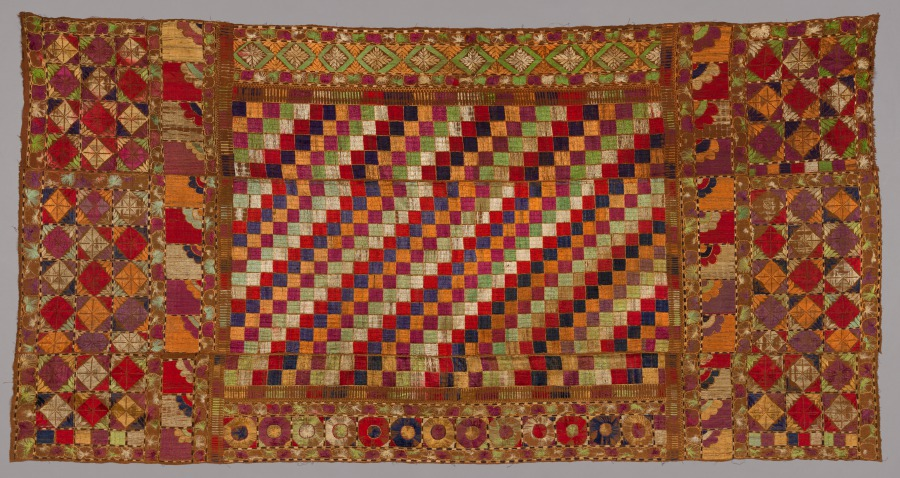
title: Shawl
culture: India, Punjab, 19th century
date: 1800s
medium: embroidery (phulkari); silk on cotton ground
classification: Embroidery